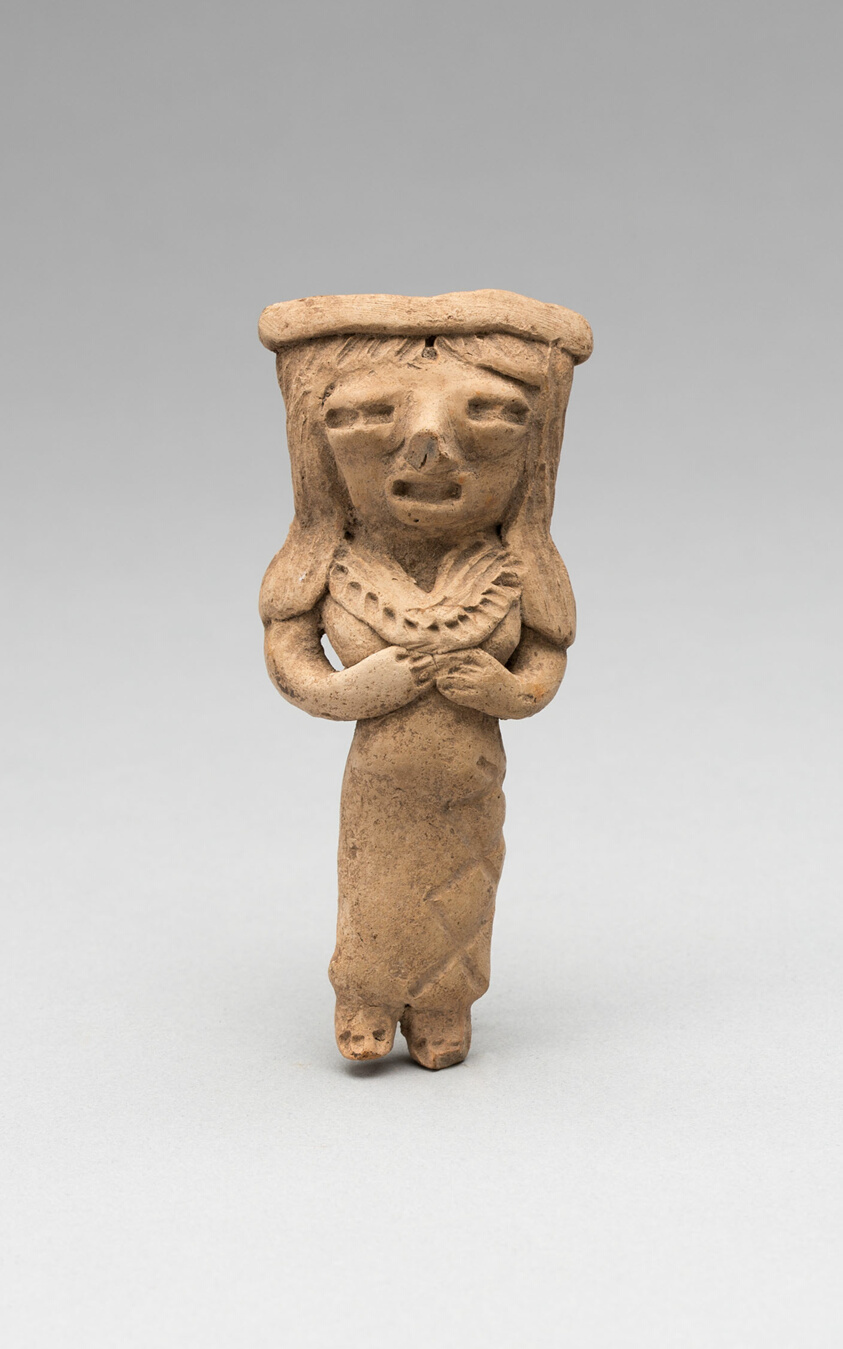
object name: Sculpture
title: Female Figure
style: michoacan, Arts of the Americas, mesoamerican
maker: Michoacan (Michoacan, Mexico)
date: 300 BCE–250 CE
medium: Ceramic and pigment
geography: Michoacán state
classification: earthenware; art of the americas; ceramics; sculpture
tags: people